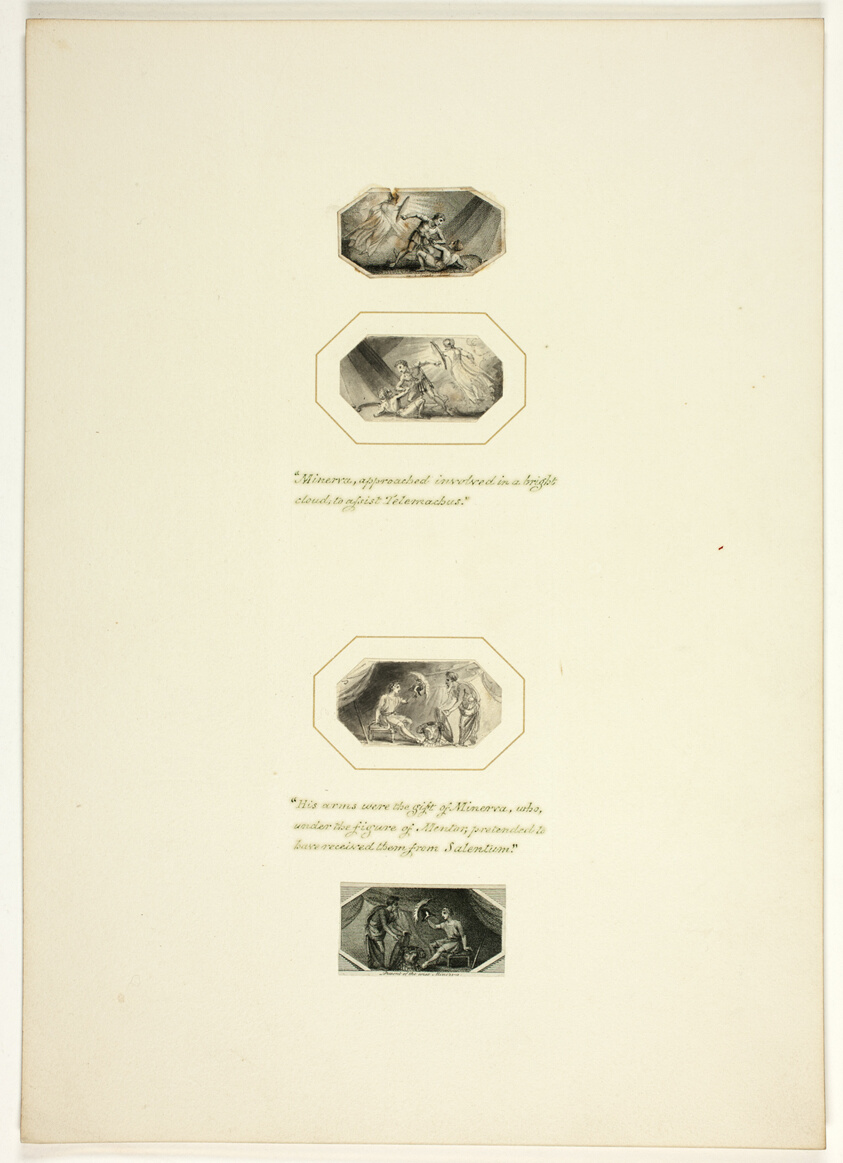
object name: Print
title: Plate from Telemachus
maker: after Thomas Stothard (English, 1755-1834); published by T. Baker (English, 19th century)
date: c. 1797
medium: Engraving on paper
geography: England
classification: engraving; drawings (visual works); prints and drawing; print